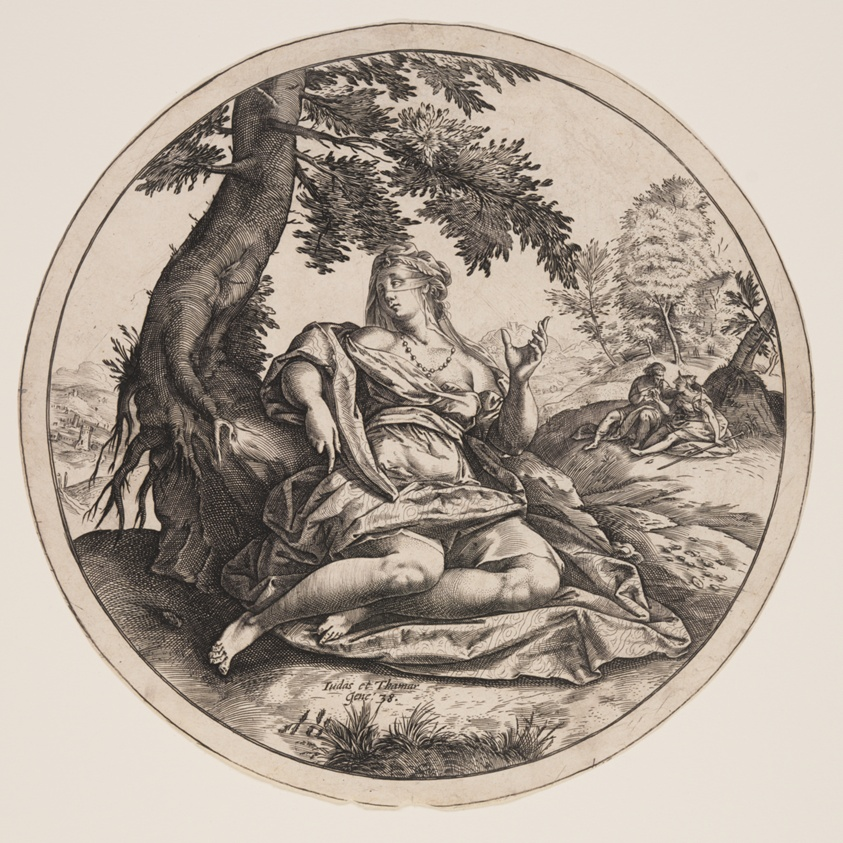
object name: Print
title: Judah and Thamar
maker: After Hendrick Goltzius; Dutch, 1558–1617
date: c. 1600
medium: Engraving on laid paper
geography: Netherlands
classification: engraving; paper; print; prints and drawing